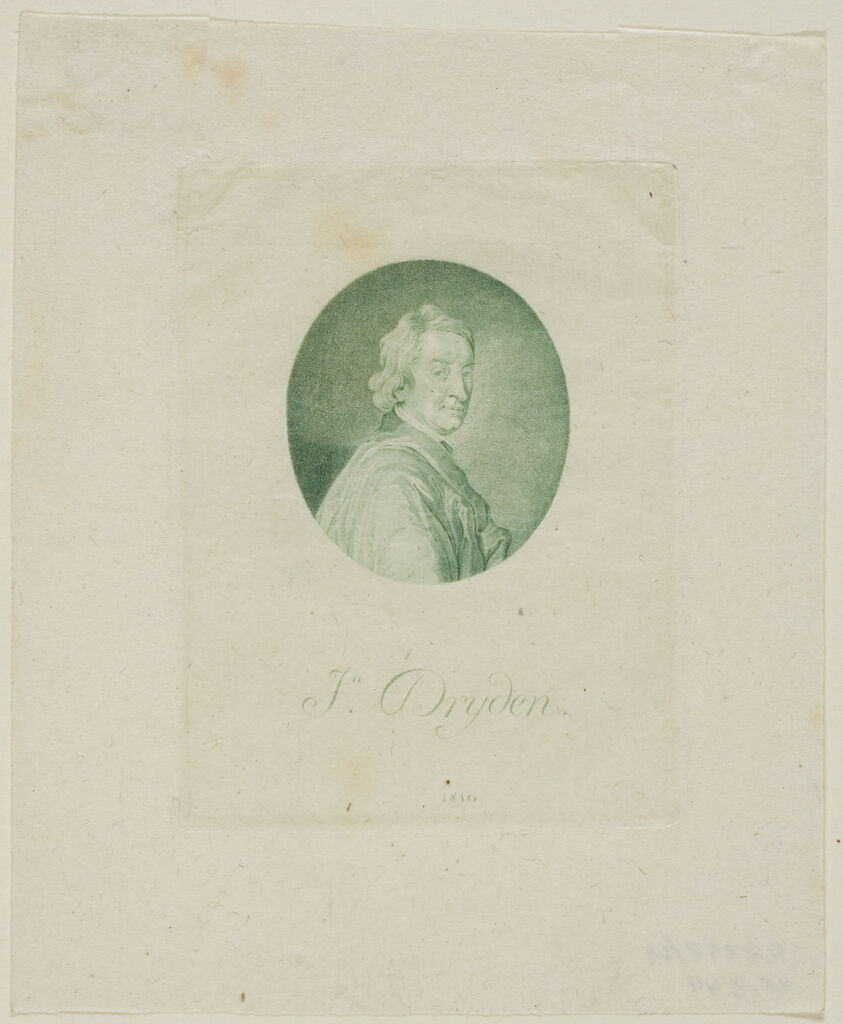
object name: Print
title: John Dryden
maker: Jean-Baptiste de Grateloup (French, 1735-1817); Jean Pierre Sylvestre (French)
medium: Engraving on paper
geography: France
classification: aquatint; print; prints and drawing